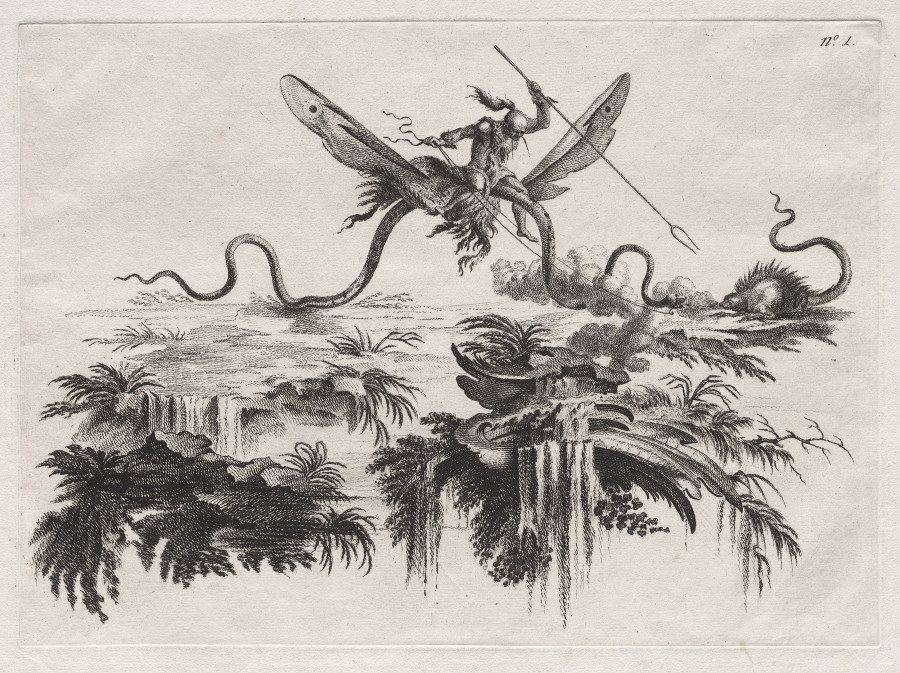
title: A Savage mounted on a winged Serpent battling with a wild beast resembling a Porcupine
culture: Italy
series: Suite of the Most Notable Things Seen by John Wilkins Erudite English Bishop during His Famous Voyage from the Earth to the Moon … dedicated to Sir William Hamilton ambassador to the Court of Naples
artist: Filippo Morghen (Italian, 1730–after 1807)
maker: possibly after Jean-Pierre-Louis-Laurent Hoüel (French, 1735–1813)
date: about 1769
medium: etching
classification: Print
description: Filippo Morghen’s set of 10 etchings is outstanding among visual narratives of imaginary voyages to the moon, both visual and literary, that intrigued 18th-century European audiences. A title page and nine plates depict the imagined lives and economy of moon dwellers. These include modes of transport such as large birds and sailboats propelled by giant bellows, enormous scissors for capturing wild beasts (including an oversized rat), and the use of giant pumpkins as fishing boats and as dwellings. Representations of the moon dwellers are based on inaccurate and imaginary European interpretations of Asian, Ottoman, and Native American cultures—called chinoiserie and turquerie—that permeated the decorative and visual arts of the period.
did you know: Morghen based this print series on three books dedicated to moon exploration, including Bishop Francis Godwin’s The Man in the Moone (1640).